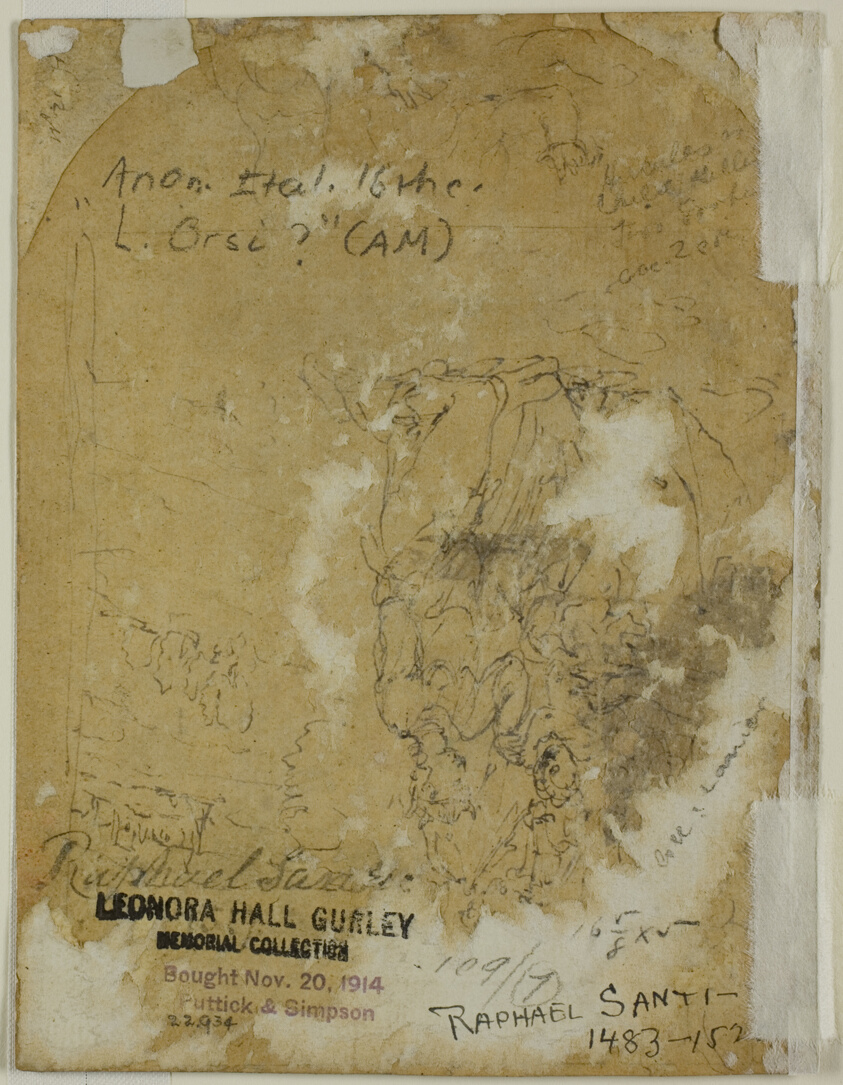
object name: Drawing and Watercolor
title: The Infant Hercules Strangling Serpents in His Cradle (recto); Crowned Woman Kneeling in Landscape, and Other Sketches (verso)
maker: Attributed to Prospero Fontana; Italian, 1512-1597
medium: Pen and brown ink with brush and brown wash (recto), and pen and brown ink (verso), on tan laid paper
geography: Italy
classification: ink with wash; drawings (visual works); prints and drawing